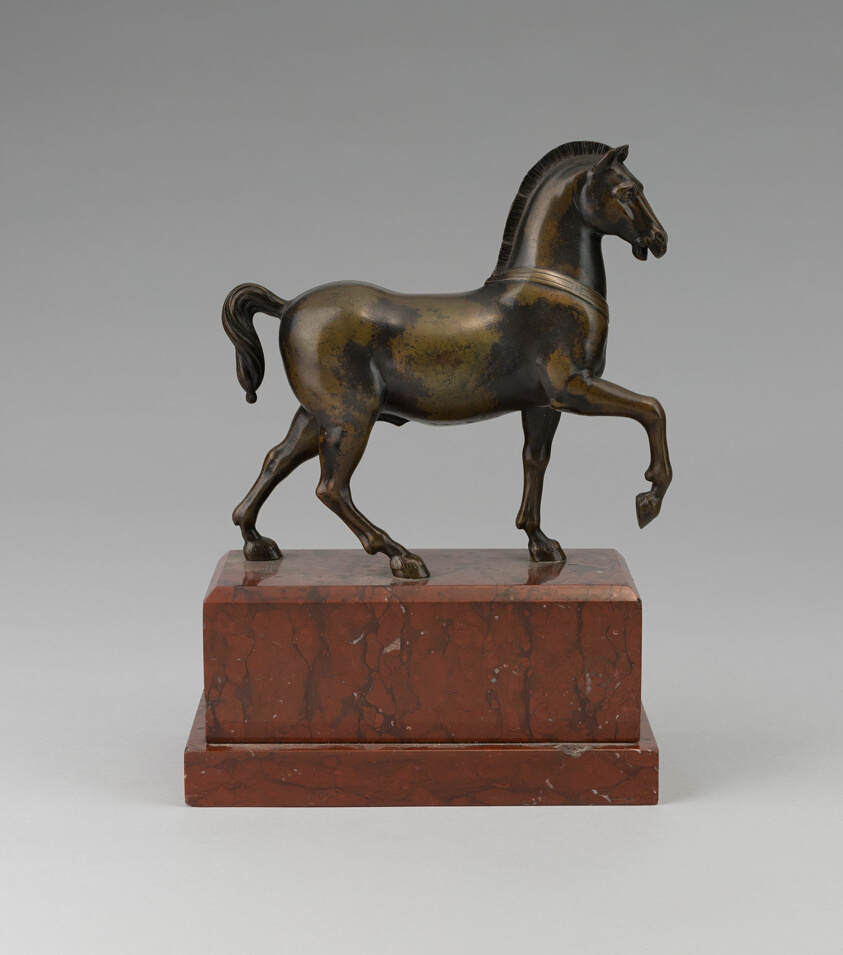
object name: Sculpture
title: Stallion (one of a pair)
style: 17th Century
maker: Italian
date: c. 1650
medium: Bronze, patina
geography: Italy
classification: statuette; sculpture; bronze; Italian; metal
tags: horse, figure, animals